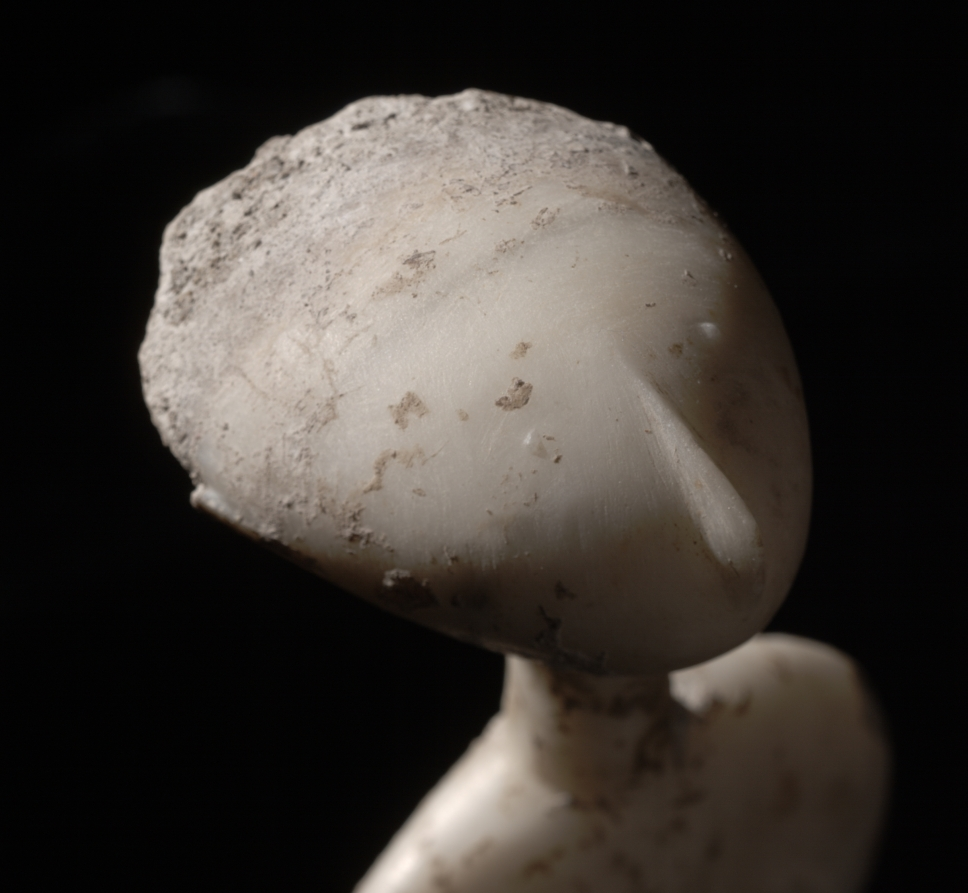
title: Statuette of a Woman: "The Stargazer"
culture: Western Anatolia, early Bronze Age (c. 3300–1200 BCE)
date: c. 3000 BCE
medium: marble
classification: Sculpture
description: "The Stargazer" moniker was given to this diminutive marble sculpture because its upturned head looks toward the heavens. Details carved into the stone are visible while painted features have been lost to time. We do not know how this object was used, but its enigmatic nature invites speculation.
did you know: We can identify this mysterious figure as female by the inscribed pubic triangle below her waist.